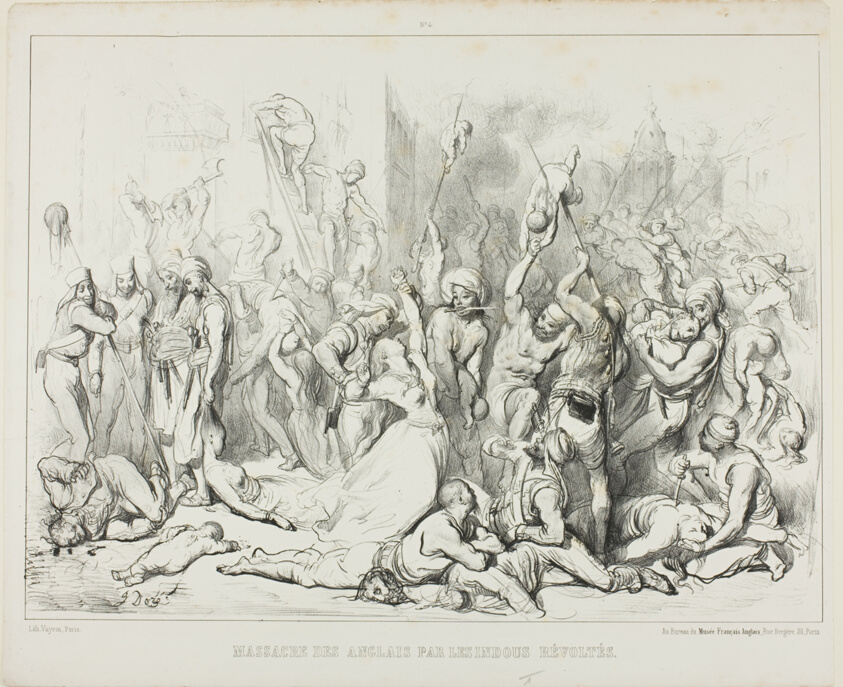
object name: Print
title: Massacre of the English by Revolting Hindus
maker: Gustave Doré (French, 1832-1883)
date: 1857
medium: Lithograph in black on white wove paper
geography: France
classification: lithograph; print; prints and drawing